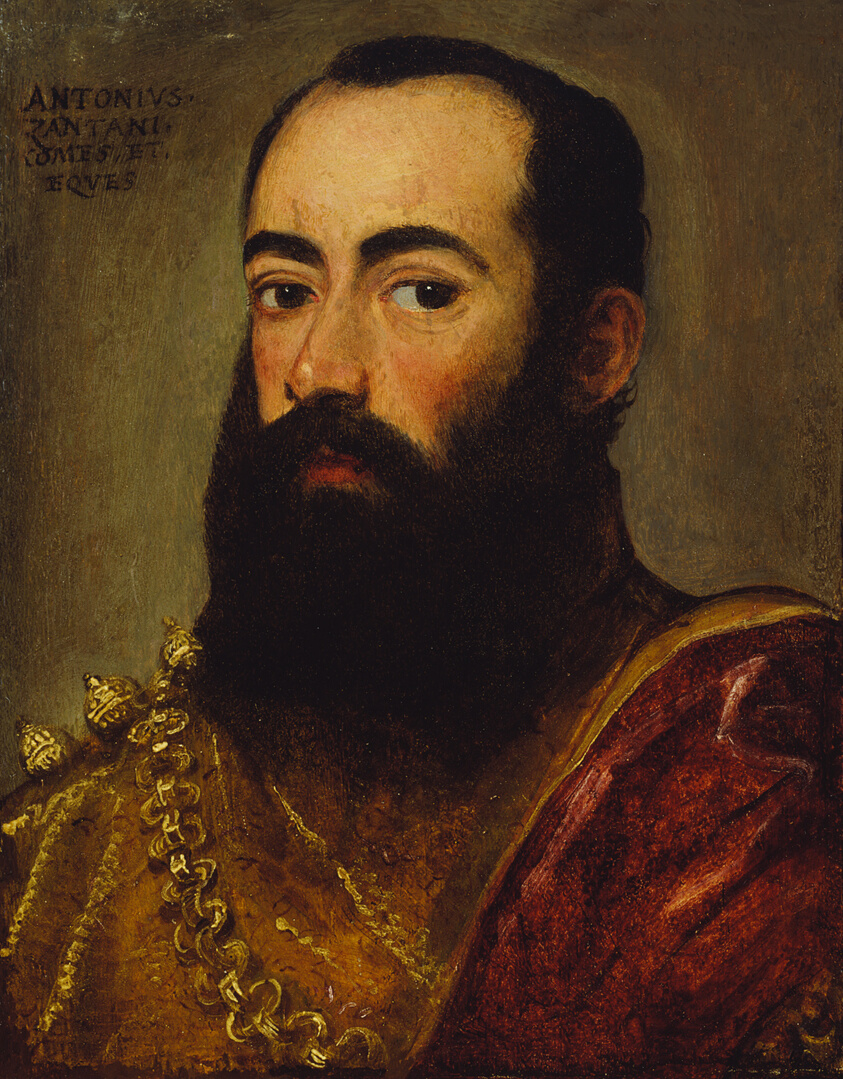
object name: Painting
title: Portrait Presumed to Be of Antonio Zantani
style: sixteenth century, 16th Century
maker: Venetian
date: c. 1555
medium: Oil on panel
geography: Venice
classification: oil on panel; Italian; oil paintings (visual works); paint; portrait; painting; european painting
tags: portraits: male subject, wealth, luxury, bearded man, gold (color), jewelry, man, portrait, portraits